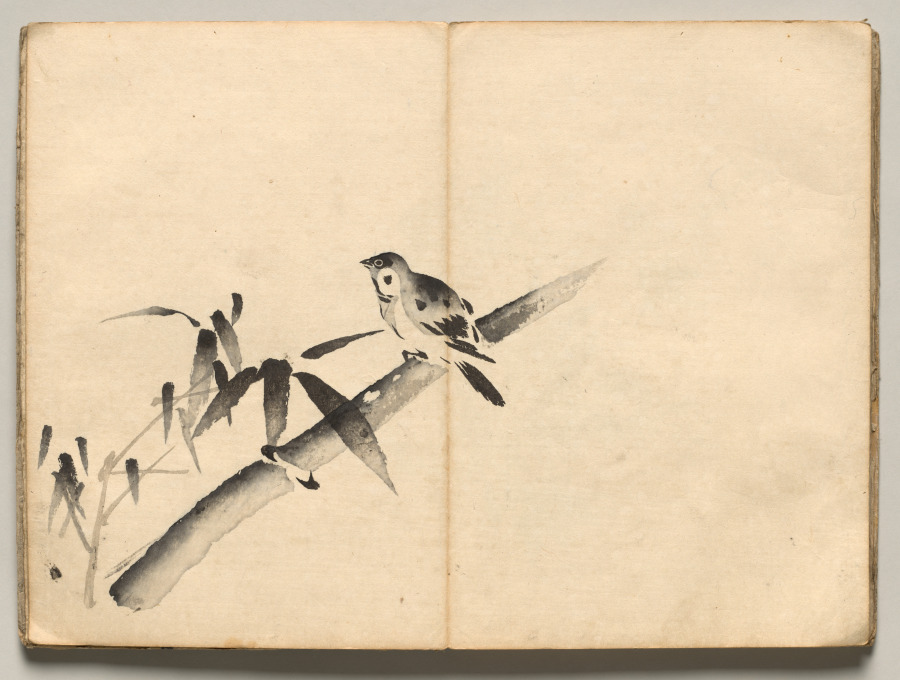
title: Sparrow in Bamboo from Ōkyo Picture Book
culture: Japan, Edo period (1615–1868)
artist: after Maruyama Ōkyo (Japanese, 1733–1795)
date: 1850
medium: accordion-style woodblock printed folding-book; ink and color on paper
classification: Bound Volume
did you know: This impression of a book of woodblock-printed designs is missing a spread that depicts a crane.